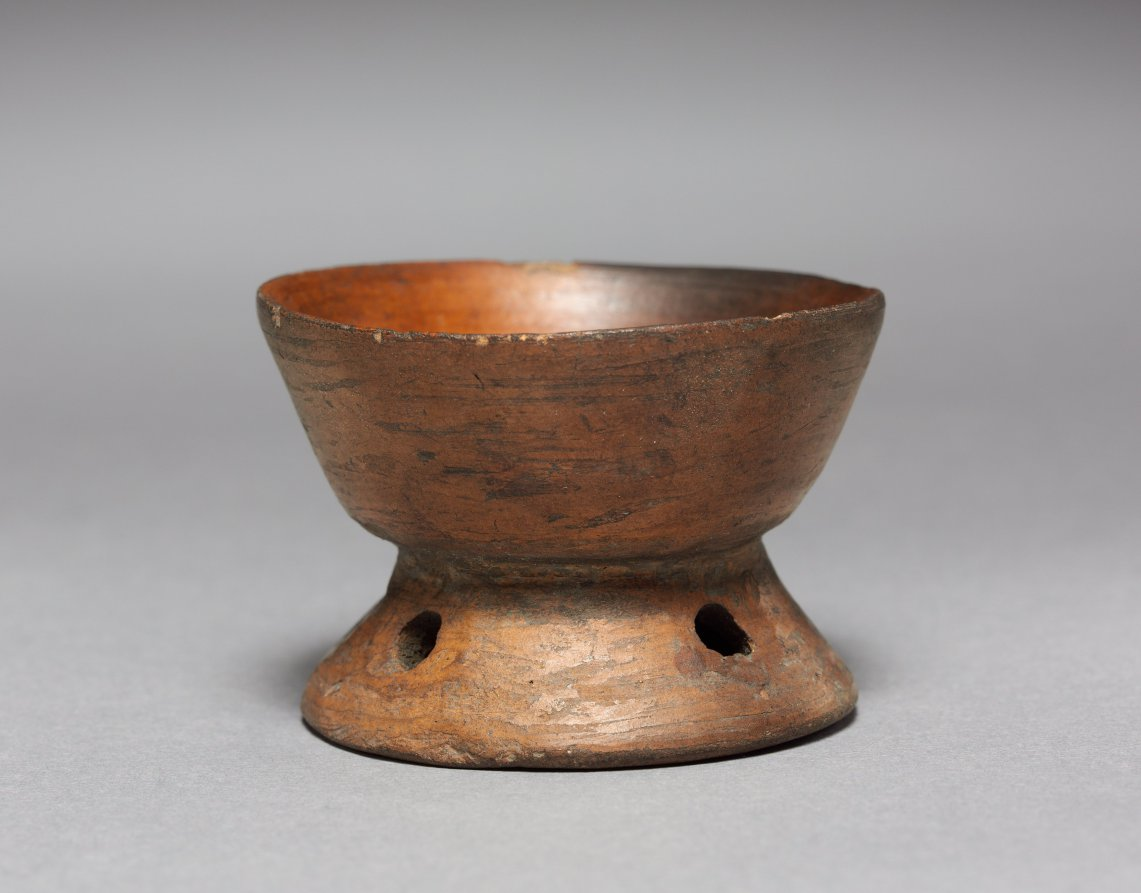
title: Dish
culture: Mexico, 16th century or earlier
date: before 1521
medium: terracotta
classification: Ceramic